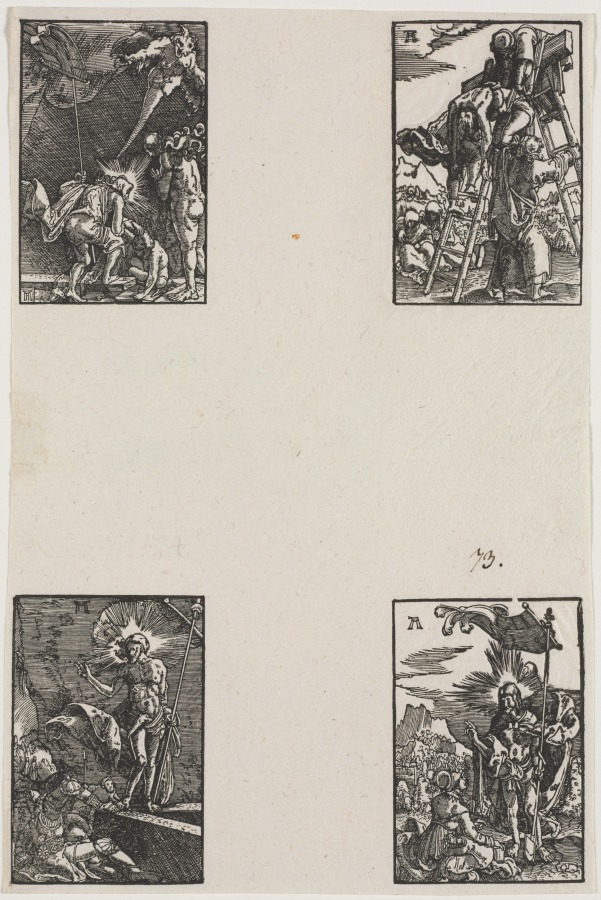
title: The Fall and Redemption of Man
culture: Germany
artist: Albrecht Altdorfer (German, c. 1480–1538)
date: c. 1515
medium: woodcut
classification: Print